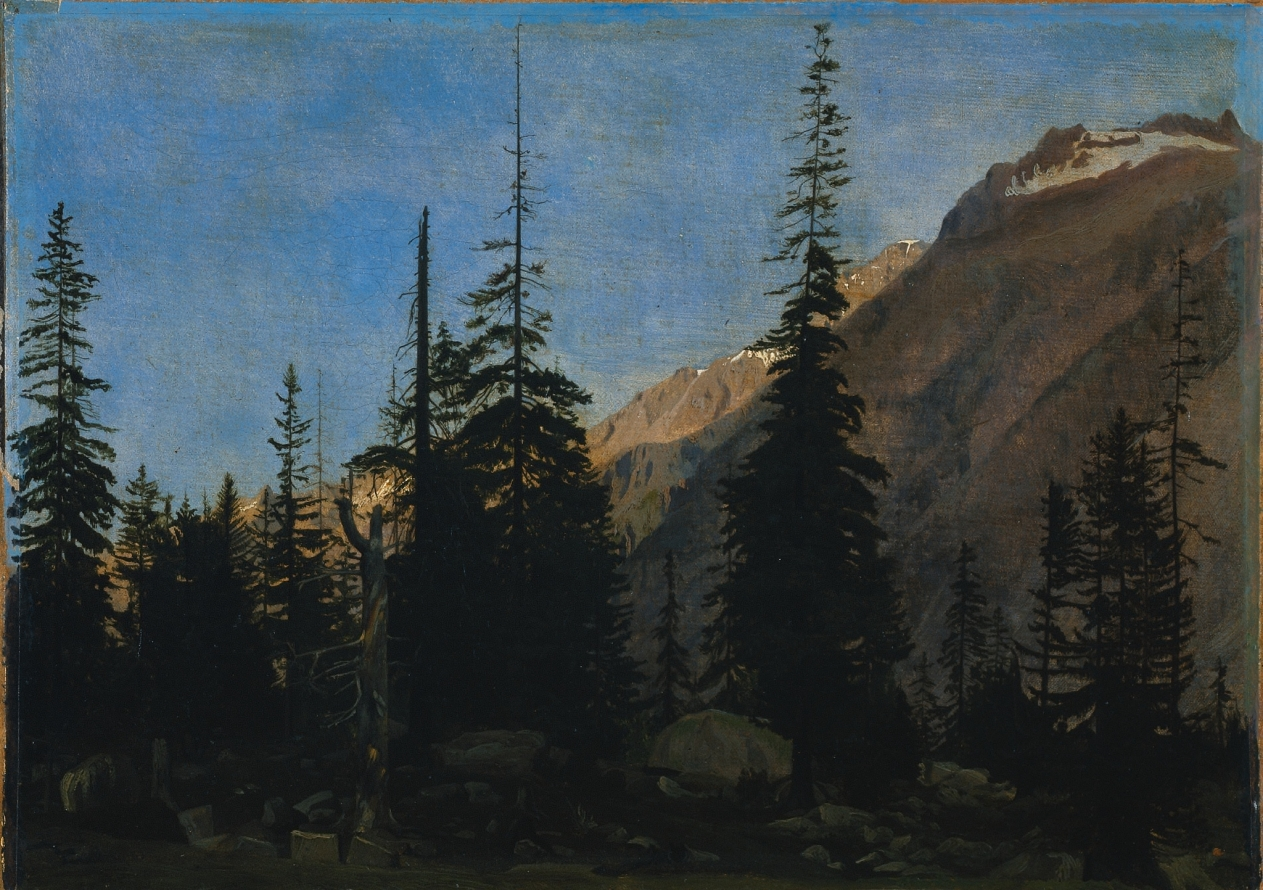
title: Alpine Landscape: The Handegg, Switzerland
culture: France, 19th century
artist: Jean-Léon Gérôme (French, 1824–1904)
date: 1850s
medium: oil on fabric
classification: Painting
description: This painting depicts a mountain peak near Handegg, a village just south of Lucerne, Switzerland. Tall fir trees reach upward from the dark foreground toward the light, which illuminates the sky and snowcapped mountains. Rising like church steeples, the trees almost touch the top of the canvas, conveying a feeling of spiritual striving. This expression of romantic, almost religious sentiment inspired by the power and beauty of nature is surprising for Gérôme, one of the leading artists of academic realism, a style distinguished by firm, precise drawing­.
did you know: In 1851, Gérôme decorated a vase for Emperor Napoleon III of France which was offered to Prince Albert of England and is now part of the Royal Collection at St. James’s Palace, London.